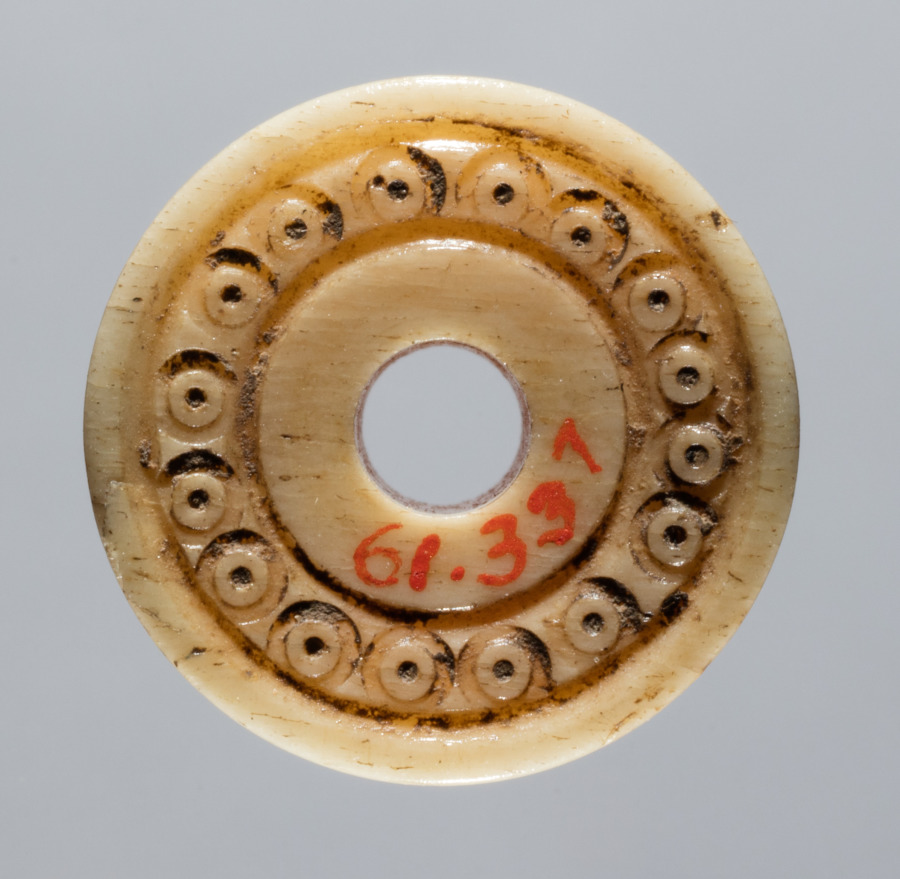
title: Spindle Whorl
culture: Iran, early Islamic period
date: 700s - 900s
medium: bone, incised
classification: Spindle Whorl